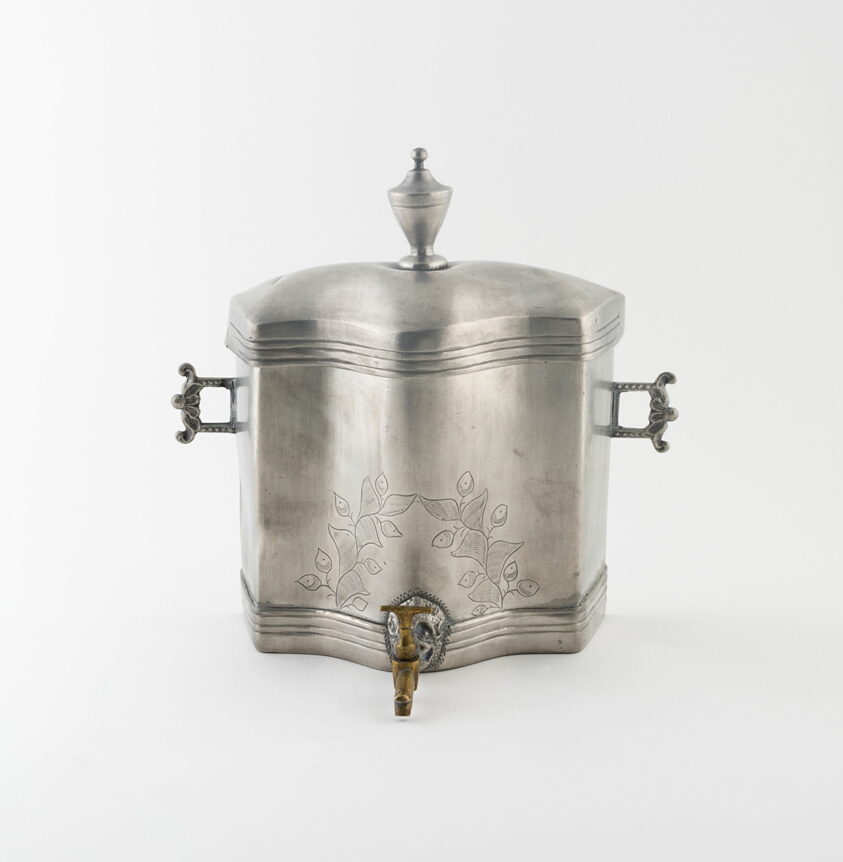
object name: Metalwork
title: Wall Cistern with Spigot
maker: Heinrich, II Hiller; Swiss, 1732-1797; Switzerland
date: c. 1790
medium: Pewter and brass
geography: Sankt Gallen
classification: pewter; metalwork; european decorative arts